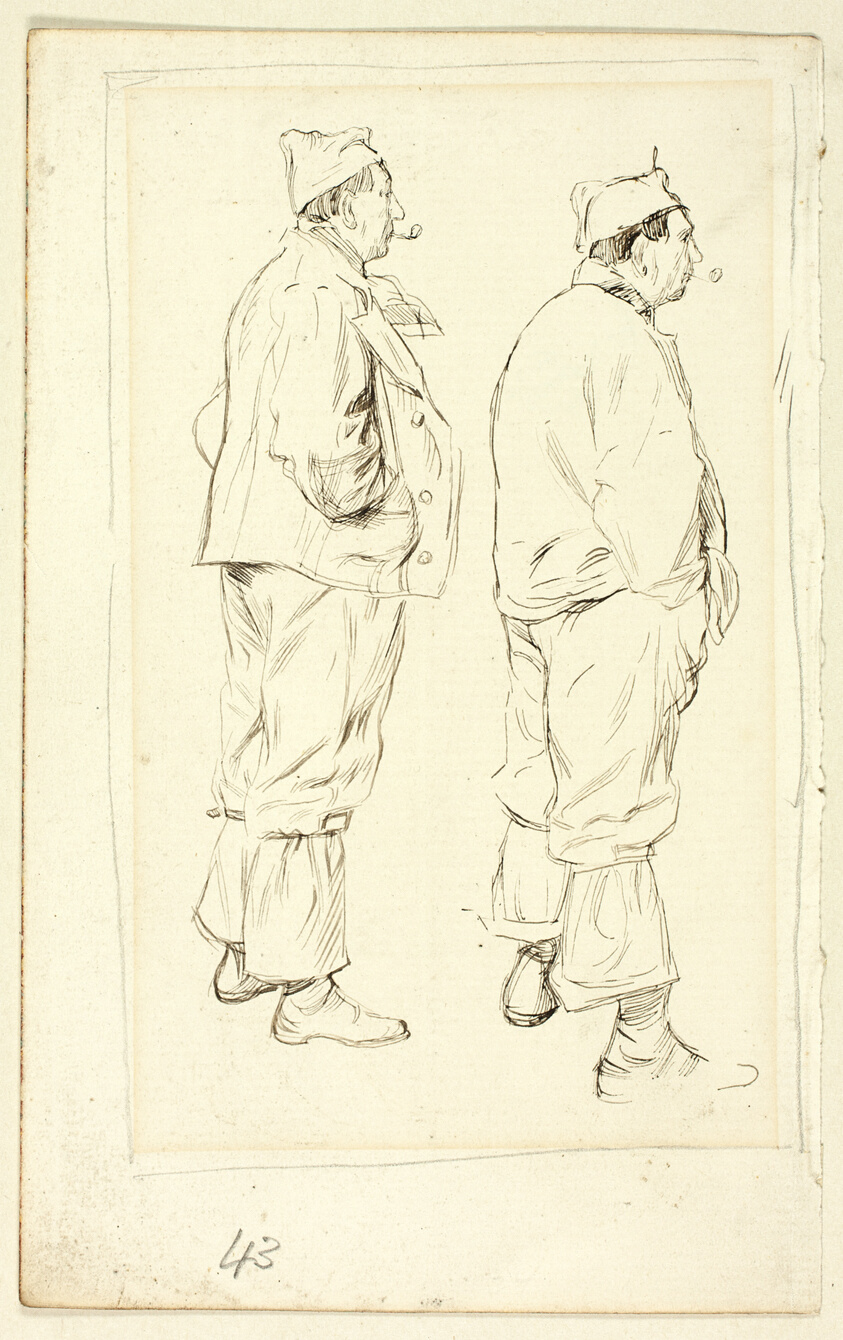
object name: Drawing and Watercolor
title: Two Sketches of Standing Laborer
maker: Henry Stacy Marks (English, 1829-1898)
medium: Pen and brown ink on cream laid paper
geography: England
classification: pen and ink drawings; drawings (visual works); prints and drawing